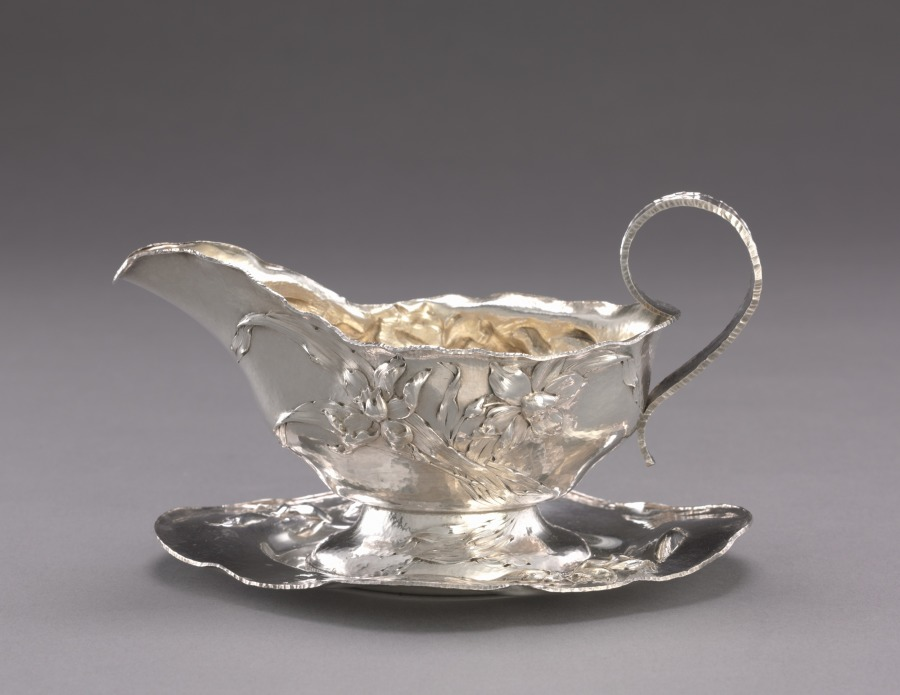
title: Sauce Boats and Trays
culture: America, Rhode Island, 19th century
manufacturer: Barbour Silver Company (American)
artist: attributed to William Christmas Codman (British, 1839–1921)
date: c. 1890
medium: silver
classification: Silver